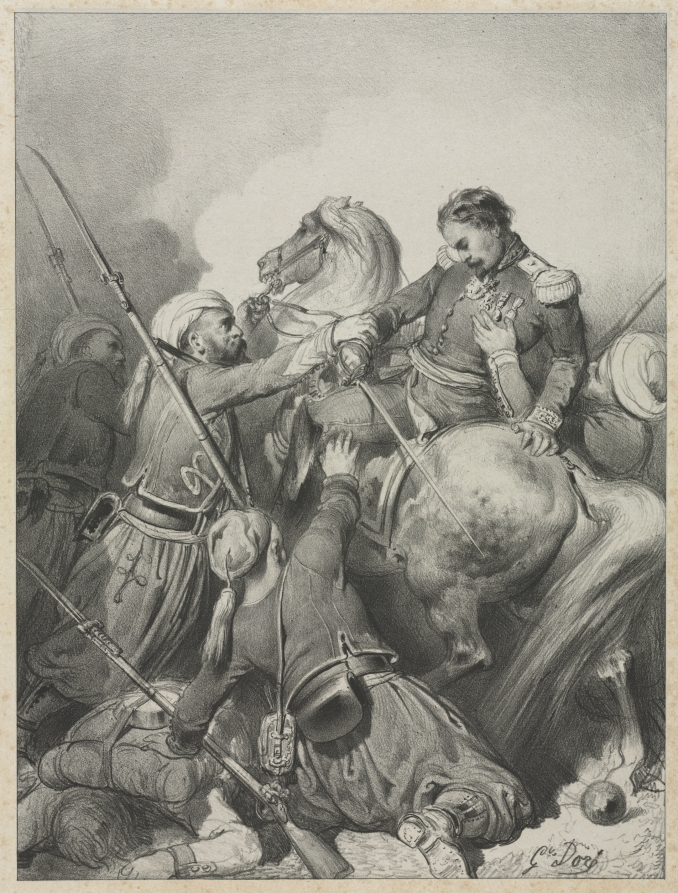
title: Sardinian Officer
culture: France, 19th century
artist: Gustave Doré (French, 1832–1883)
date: late–1800s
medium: lithograph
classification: Print